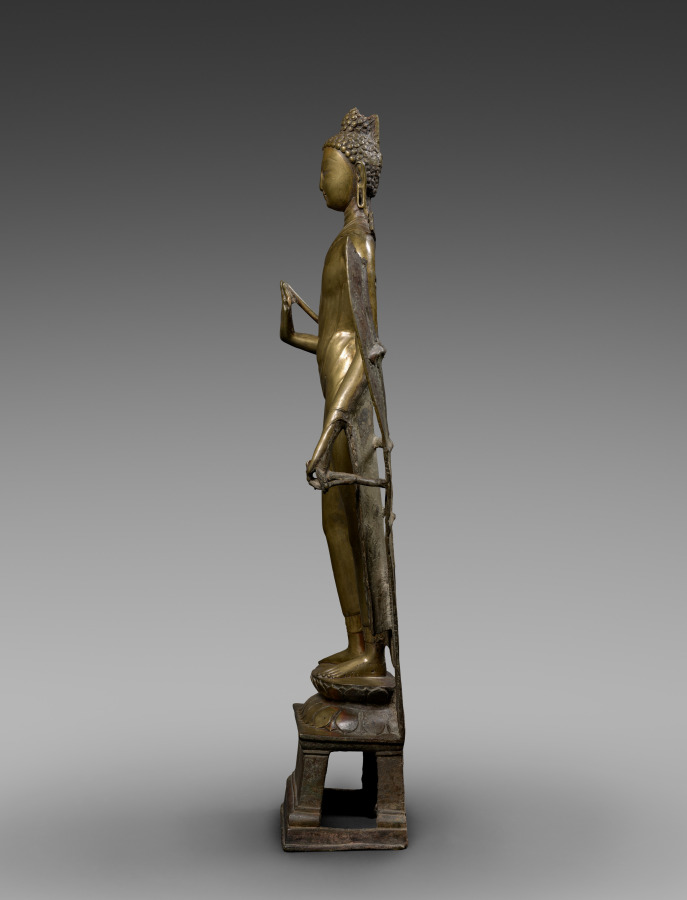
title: Standing Buddha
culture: India, Kashmir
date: c. 900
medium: brass with silver and copper inlay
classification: Sculpture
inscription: inscribed with the name of the monk who owned it: Lhatsun Nagaraja (active from c. 998 to 1026)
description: The slender athletic Buddha extends one foot slightly off the lotus pedestal, suggesting his humanity enters our world from his transcendent state. With his right hand he signals that we should have no fear. The smooth signs of wear on the sculpture indicate that it was worshiped in Kashmir, where water and other ablutions were poured over sacred images during rituals. The Tibetan inscription on the pedestal states that it belonged to a royal monk named Nagaraja (Tibetan, active about 998–1026). Sculptures like this contributed to the transmission of Buddhism from India to Tibet and served as artistic models.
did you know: The Buddha grasps the end of his robe in his left hand.